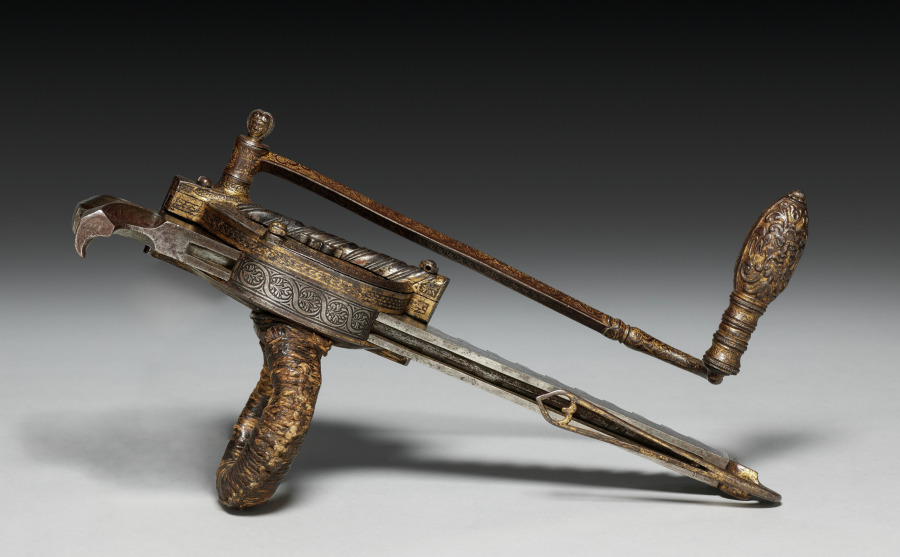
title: Cranequin with Arms of Elector Augustus I of Saxony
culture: Germany, Saxony, 16th century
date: c. 1553–73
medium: steel; etched, chased and gilded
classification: Arms and Armor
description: This winder or cranequin was for Prince Elector Augustus I, a member of the ruling elite in the Holy Roman Empire. Augustus, powerful and wealthy, had even the most practical instruments ornately decorated, including this cranequin.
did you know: Augustus was a marksman who took part in crossbow competitions. He had a large collection and often gave them to friends.